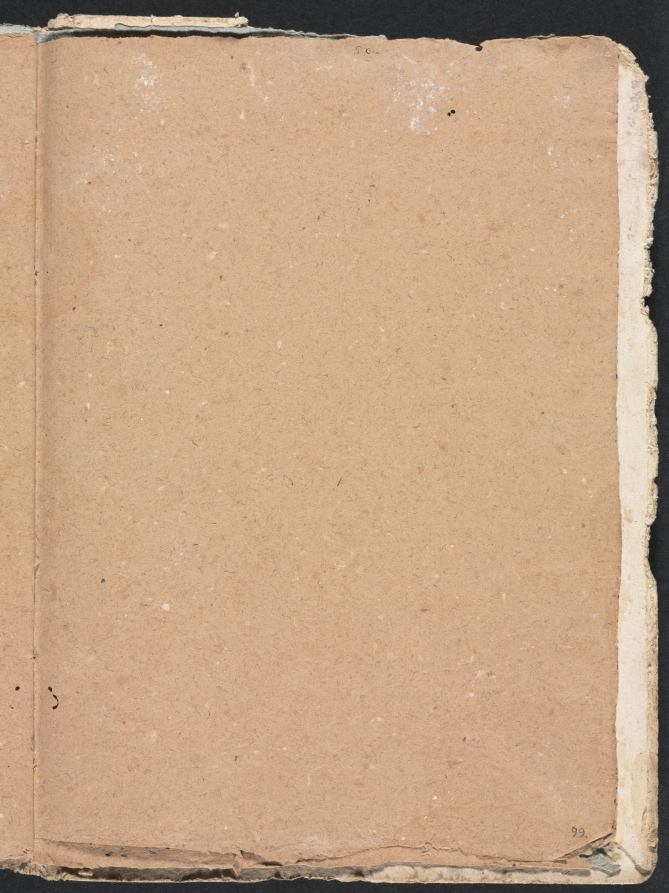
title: Verona Sketchbook: (page 99)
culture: Italy, 18th century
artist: Francesco Lorenzi (Italian, 1723–1787)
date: 1760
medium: paper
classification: Bound Volume